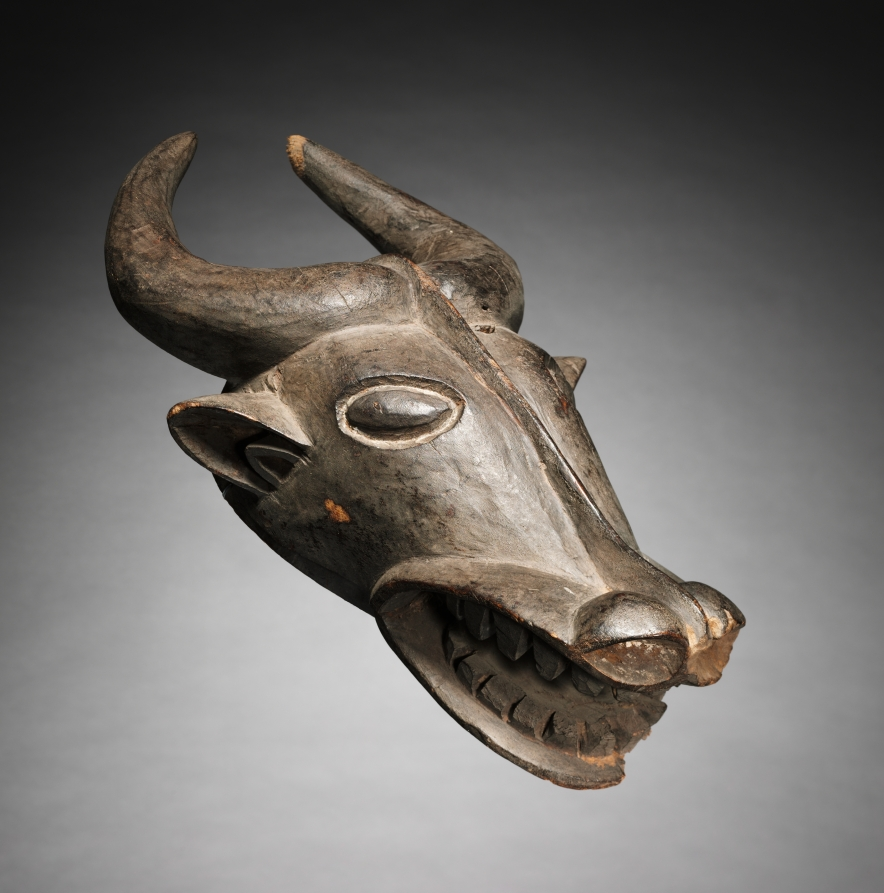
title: Headdress Mask: Buffalo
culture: Africa, Central Africa, Cameroon, Grassfields region, Bamileke-style maker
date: c. 1910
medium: Wood and colorant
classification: Mask